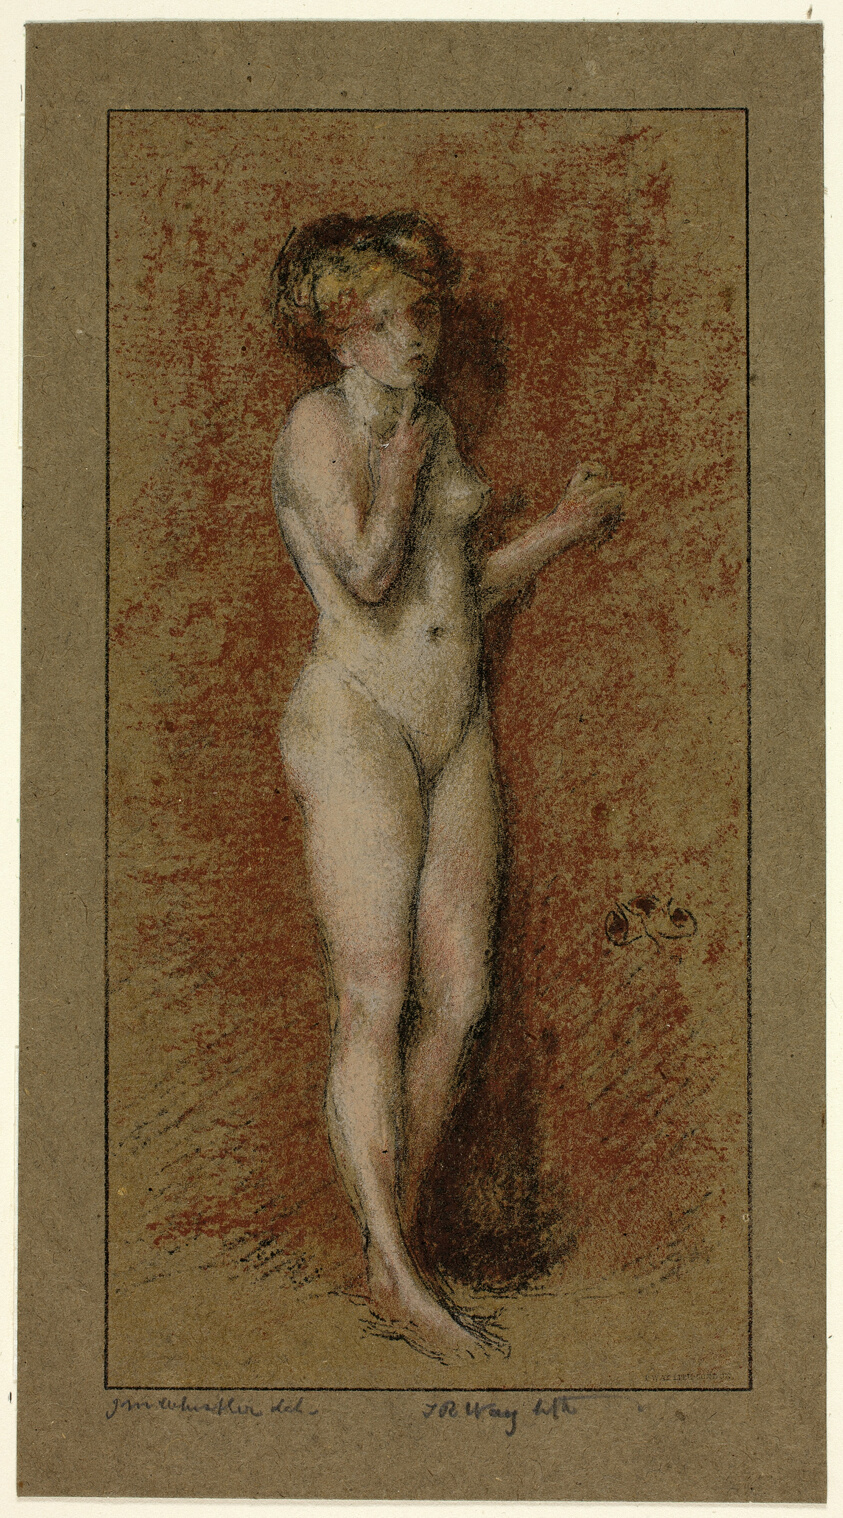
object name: Print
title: A Model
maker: Andrew Way (American, 1826-1888); after James McNeill Whistler (American, 1834-1903)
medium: Color lithograph on brown wove paper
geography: United States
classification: lithograph; print; prints and drawing